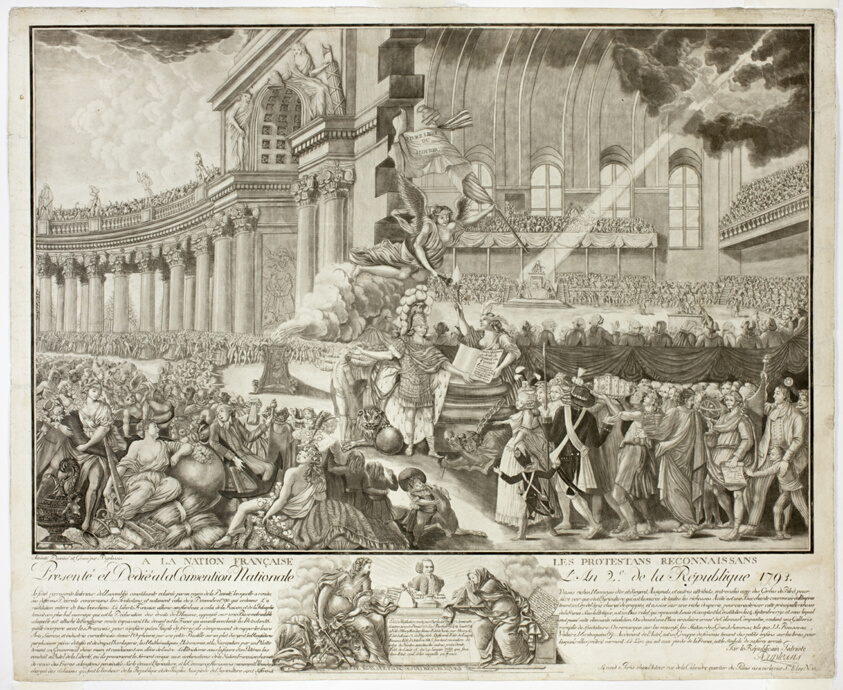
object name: Print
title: Presenté et dedié a la convention National l'an 2 de la Republique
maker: A. Duplessis (French, 18th century)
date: 1793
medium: Etching and stipple engraving, roulette and burnishing in black on off-white laid paper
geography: France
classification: etching; print; prints and drawing